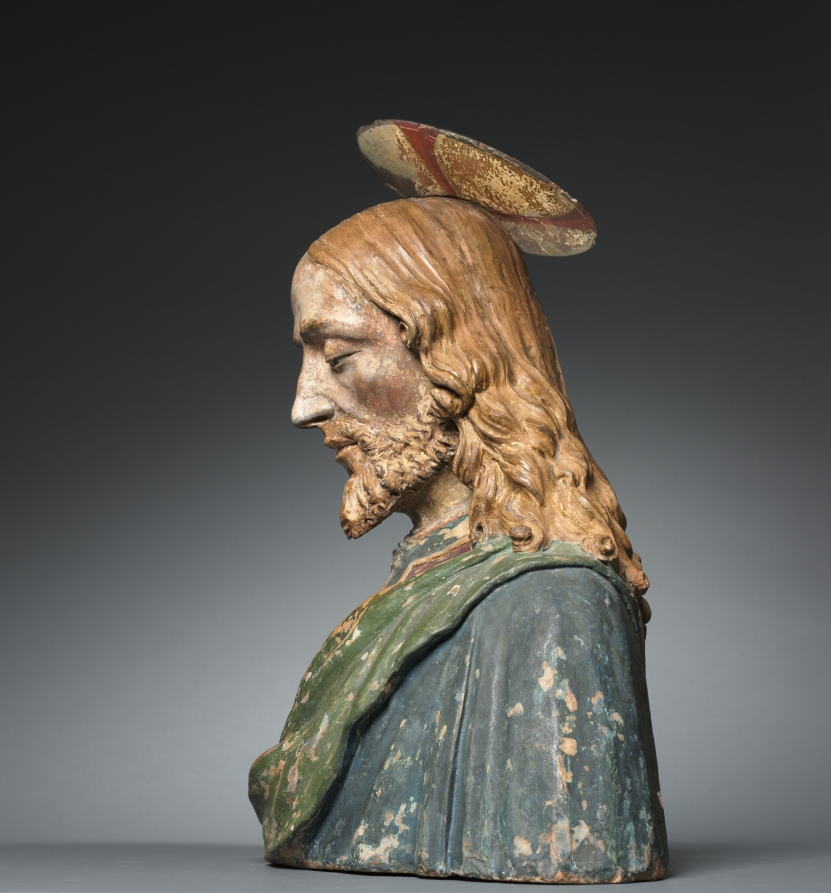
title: Bust of Christ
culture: Italy, Florence, 15th century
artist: workshop of Andrea del Verrocchio (Italian, 1435–1488)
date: c. 1470–1500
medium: painted terracotta and wood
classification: Sculpture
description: In the late 1400s Andrea del Verrochio set up a large workshop where he and his assistants reproduced copies of his sculpture and other works for a middle-class market. Originality was not the objective; in fact, most people were only interested in purchasing replicas of well-known works. This sculpture was modeled after Verrocchio's Christ figure in the bronze sculpture group Christ and St. Thomas at Orsanmichele in Florence, Italy. The medium of terracotta, which was cheaper than bronze or marble, made it possible to offer copies at a reasonable price. Additionally, workshop practices reduced the cost of the work by reducing labor time. Assistants were usually responsible for the shaping of the torso and garments, while Verrocchio was often in charge of executing the facial features and hair. In this sculpture the torso is out of proportion, and the general discrepancy in quality between the parts of the sculpture is due to the fact that it is a workshop production. Given that the facial features are so well executed and the statue retains a stirring motional quality, a trademark of Verrocchio's style which artists found hard to duplicate, it is probable that this sculpture was made in Verrocchio's studio, possibly even with active involvement by the artist on the head.